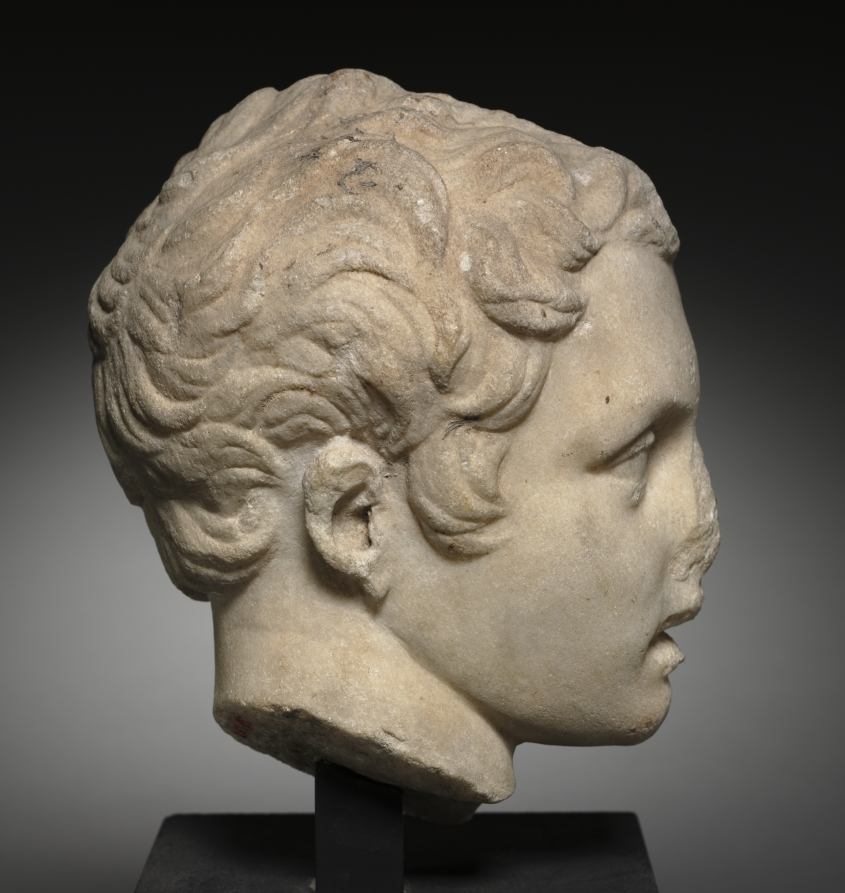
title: Eros, the God of Love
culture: Italy, Roman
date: 1–100 CE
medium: marble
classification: Sculpture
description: This is a Roman copy of the statue of Eros by Lysippus, the last of the great sculptors of Greece. He worked in the second half of the fourth century and was court sculptor to Alexander the Great. In the complete statue the god stood naked, his head turned to the right, his hand clasping a bow.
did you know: The oldest versions of Greek myth describe Eros, god of love and desire, as one of the first beings in existence.